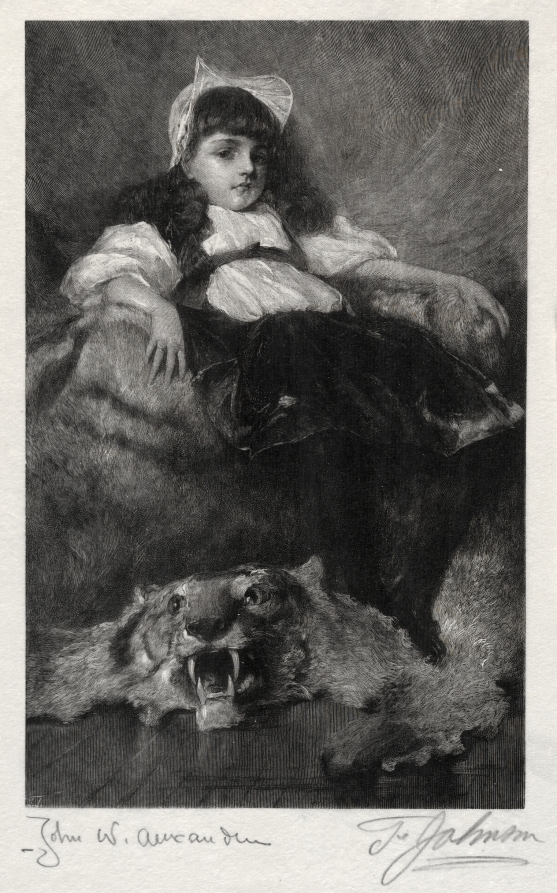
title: Portrait of a Child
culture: America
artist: Thomas George Johnson (American, 1844–1904)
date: 1887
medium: wood engraving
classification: Print